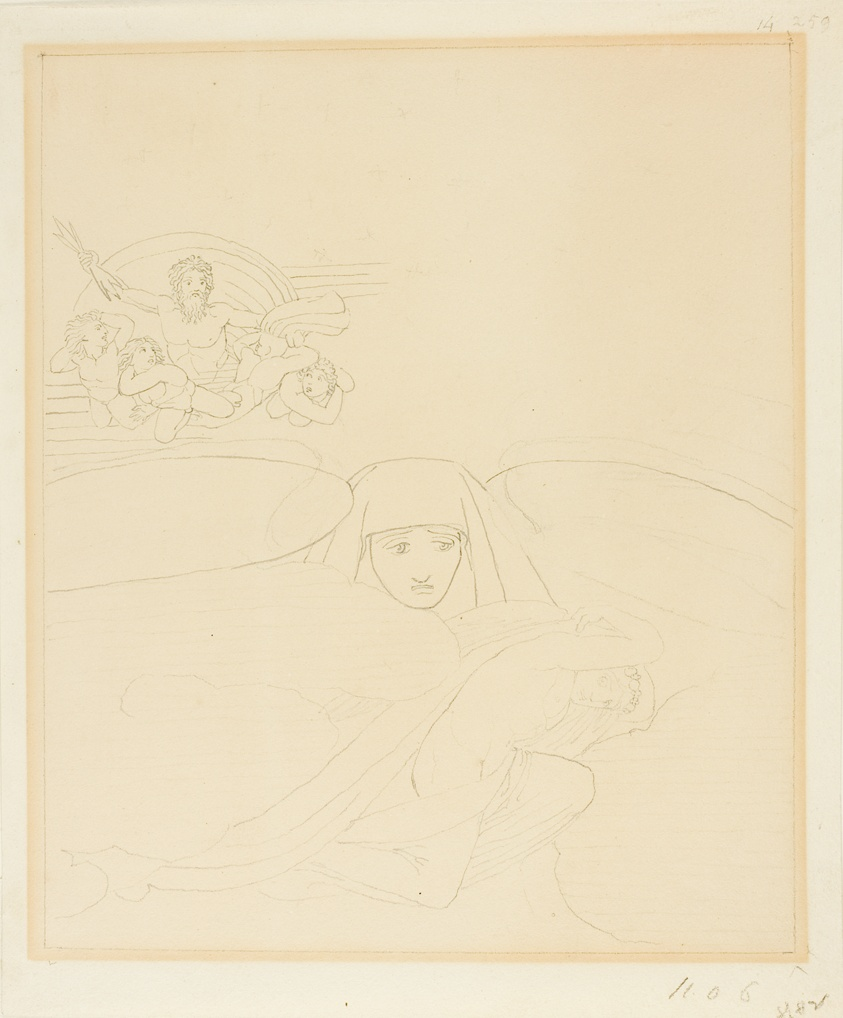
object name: Drawing and Watercolor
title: Sleep Escaping from the Wrath of Zeus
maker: John Flaxman, II; English, 1755-1826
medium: Pen and black ink, over graphite, on tan wove paper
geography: England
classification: pen and ink drawings; drawings (visual works); prints and drawing